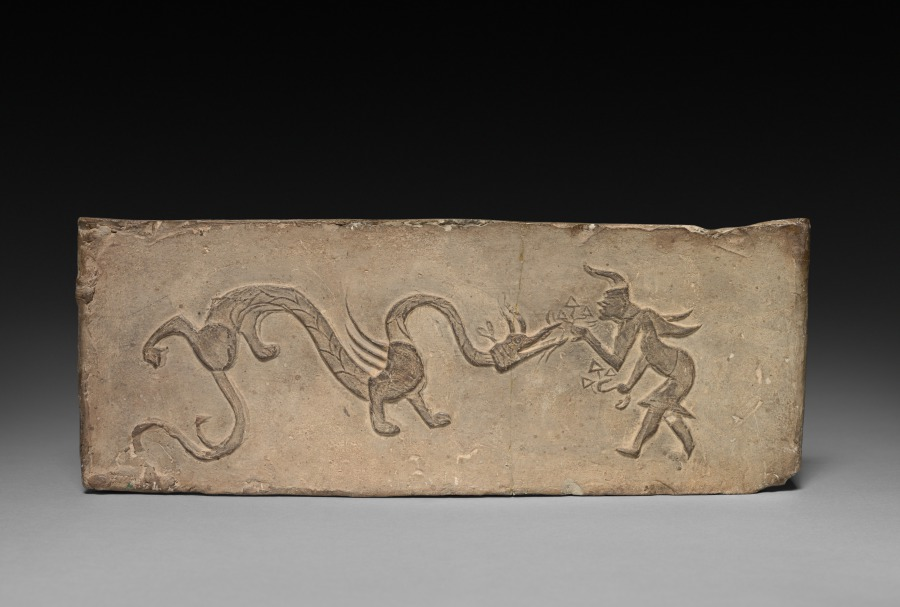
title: Panel from Model Cooking Stove: Fairy Feeding Lingzhi Fungus to a Dragon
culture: China, from a tomb in Xi'an, Shaanxi province, Western Han dynasty (206 BCE–8 CE)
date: 100–1 BCE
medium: earthenware with impressed relief decoration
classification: Ceramic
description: Han dynasty tombs were often furnished with grave goods to provide the deceased with items for the afterlife. This panel with a dragon was part of a miniature pottery stove to be placed in a burial chamber. This scene of a dragon being fed fungus by a winged fairy is molded on the panel. The dragon is an auspicious creature and an animal of the cardinal directions that protects the east.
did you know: Han dynasty tombs were often furnished with grave goods to provide the deceased with items for the afterlife.